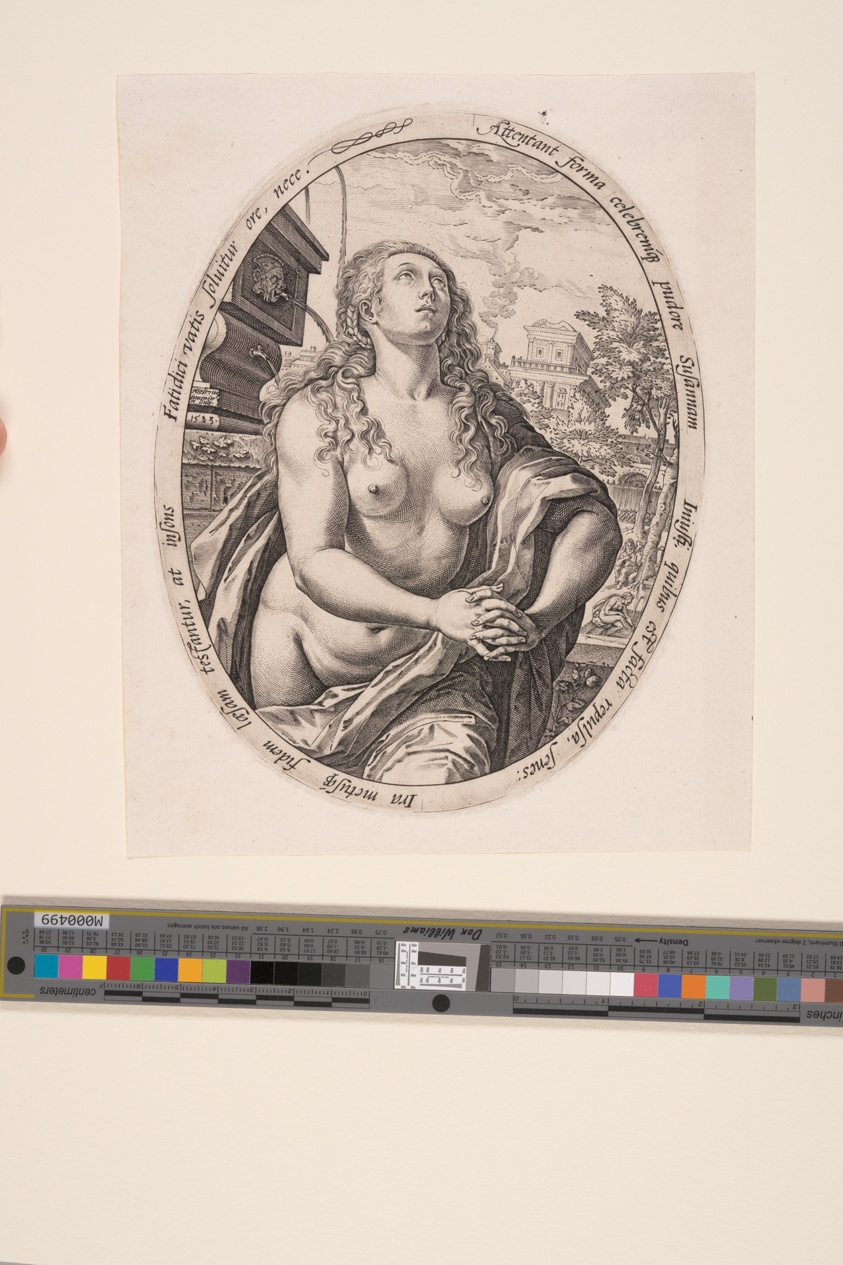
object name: Print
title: Susanna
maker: Hendrick Goltzius (Dutch, 1558–1617)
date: 1583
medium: Engraving on laid paper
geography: Netherlands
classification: engraving; paper; print; prints and drawing